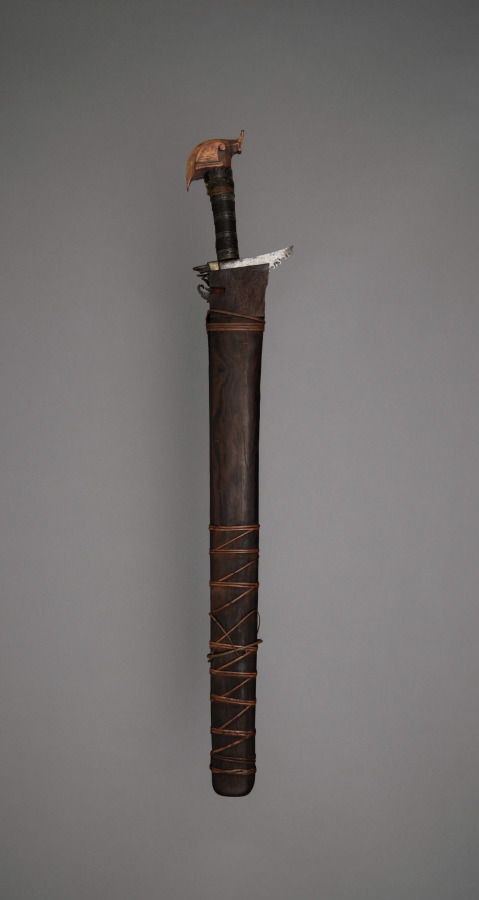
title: Sword (Kalis or Sundang)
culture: Philippines, Mindanao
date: before 1918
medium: Blade: metal; handle: metal with silver and braided twine; pommel: ivory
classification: Arms and Armor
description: This sword’s blade is straight near the tip and transitions into gentle undulations toward the lower half. The guard consists of pierced okir wings, secured on one side by a single asang-asang clamp (also called baca-baca by the Maranao). The hilt is wrapped in dark fiber or rattan bindings and metal ferrules, and fitted with a small, comparatively modest cockatoo (kakatua) form.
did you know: The asang-asang—literally “fish gill”—stabilizes the blade while referencing the purifying quality attributed to fish gills.